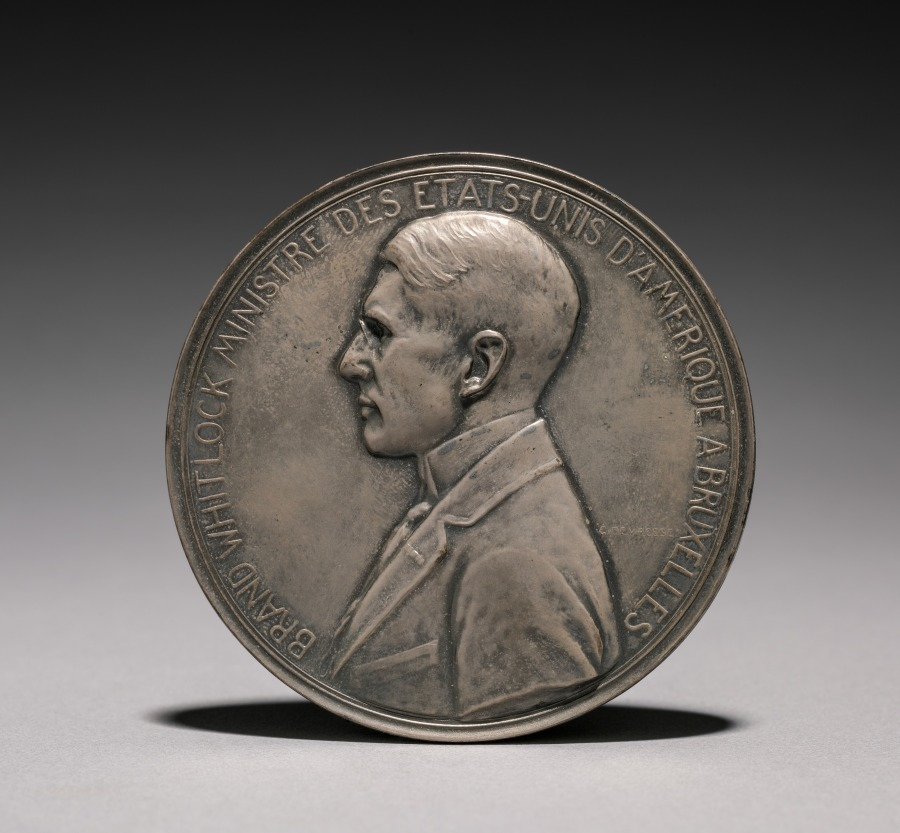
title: Medal (obverse)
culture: Belgium, 20th century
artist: Godefroid Devreese (Belgian, 1861–1941)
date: 1914–1915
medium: bronze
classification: Metalwork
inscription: "Brand Whitlock ministre de Etats-unis D'Amerique a Bruxelles."